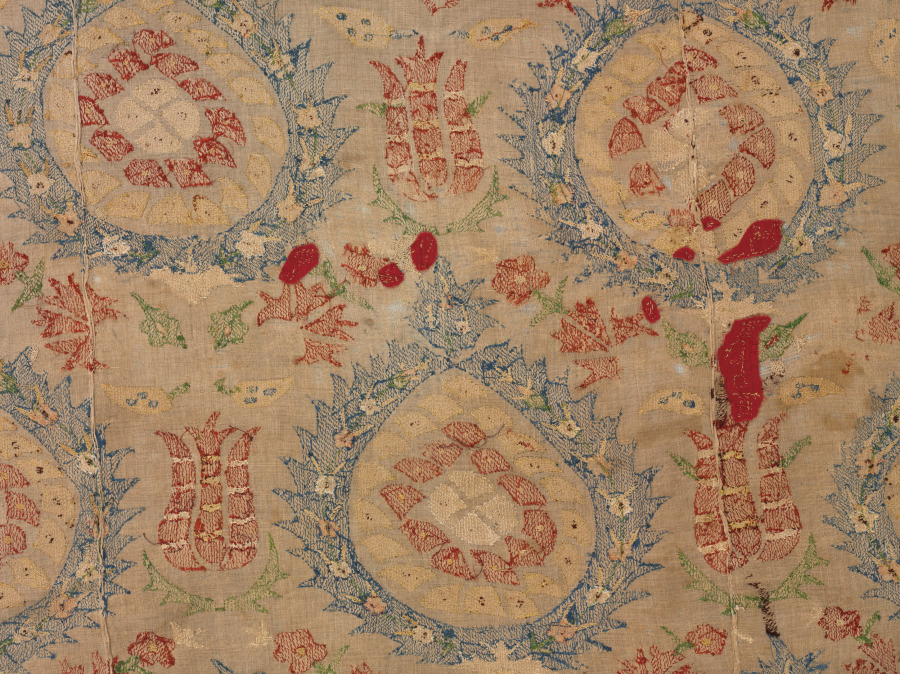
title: Embroidered quilt with pomegranates and tulips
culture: Turkey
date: 1600s-1700s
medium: plain weave: linen; embroidery, running stitch: silk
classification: Embroidery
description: In Turkey, embroidered motifs were often adapted from Ottoman court art, especially luxury silks. Even the same six colors of silk thread were used: crimson or red, blue, green, and brown/black, plus yellow and white that replaced costly gilt- and silver-metal thread. In a typically bold style, pomegranates are framed by serrated leaves. Most of the original dark brown silk thread of the floral stems has disintegrated, revealing black ink outlines on the linen ground.